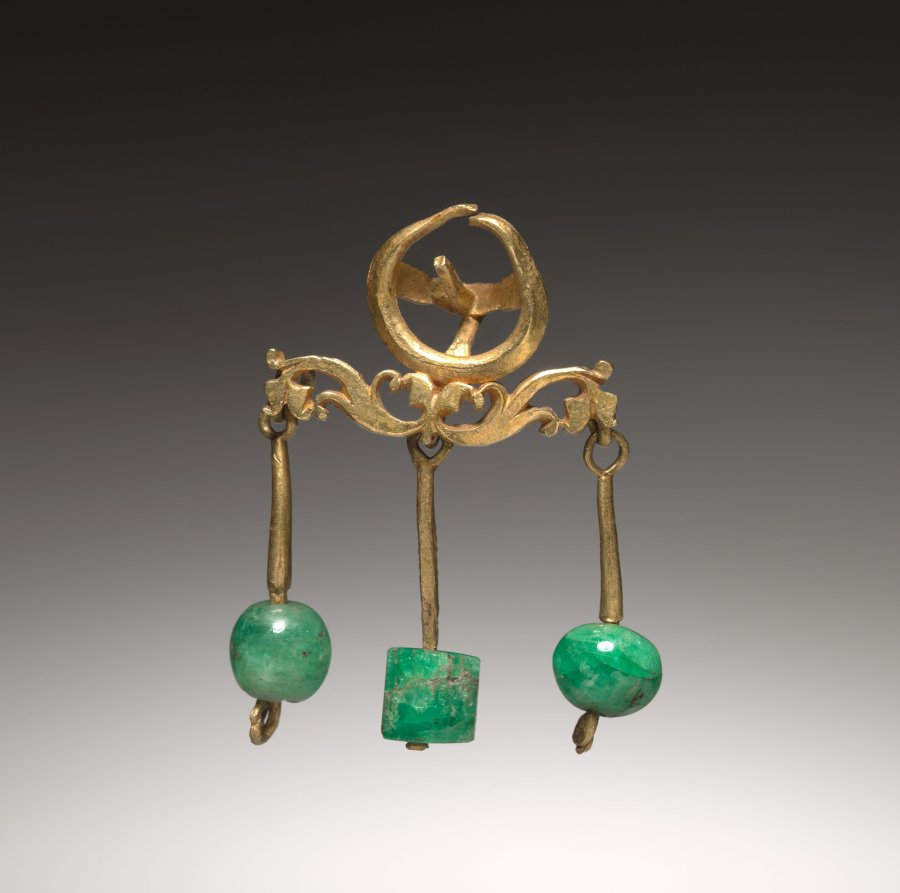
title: Earring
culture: Byzantium (style of), probably 19th-20th century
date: probably 1800s-1900s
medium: gold with jade pendants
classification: Jewelry